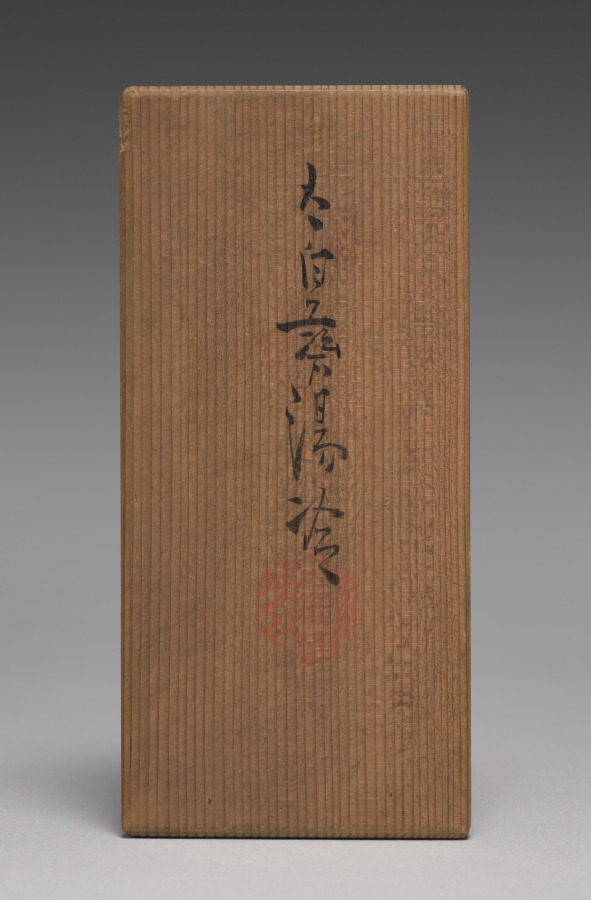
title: Water Cooler with Chinese Gardens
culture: Japan, Meiji period (1868–1912)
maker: Seifū Yohei III (Japanese, 1851–1914)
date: 1893–97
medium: Porcelain with molded and carved designs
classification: Ceramic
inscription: Artist's seal beneath the handle.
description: Unlike most pieces by the Seifu Yohei studio, this one bears a seal beneath the handle rather than on the base. The glaze and technique are identified on the box as taihakuji, or “great white porcelain,” an important early invention Yohei III devised in 1872 that involved the combination of a distinctive translucent, creamy glaze over an ivory-colored clay body. The body’s two sides have garden scenes seen through windows. Designs of flowers and butterflies are incised in the spaces at both ends. The garden on the right-hand side of the vessel, seen through a round window, has a decorative rock with grasses beneath a cloudy sky; and on a tiled veranda, there is a teapot as well as a fan and two scrolls inserted into a double-handled urn or kettle atop a brazier. The garden on the left-hand side has two enormous flowers below what may be either a cloud or a rippling pond; a garden rock—or perhaps a carved wood sculpture—with a circular perforation sits on what appears to be a veranda. While the details may be open to interpretation, the setting is a rather glamorous Chinese residence or palace with a superbly tended garden in spring or summer.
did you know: This water cooler has a handle with a dragon head.